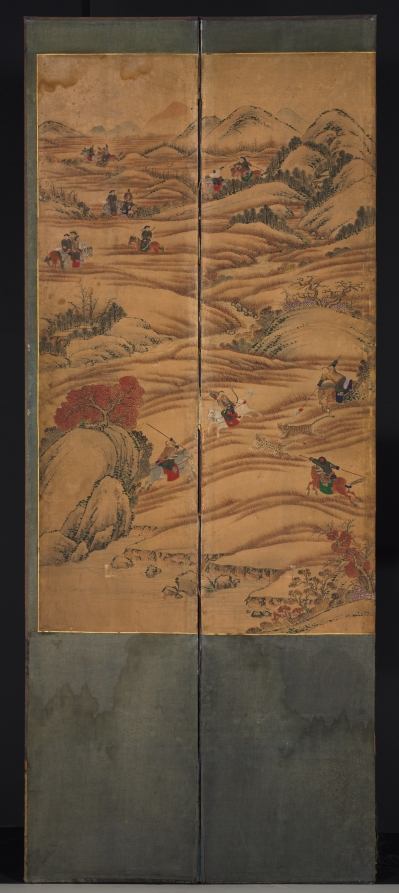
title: Hunting Scene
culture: Korea, Joseon dynasty (1392–1910)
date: 1800s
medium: eight-panel folding screen; ink and color on silk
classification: Painting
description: The theme of nomad warriors riding horses and hunting wild animals was first painted in the Qing imperial court in China in late 1600s. But it became favored by the Korean royal court and painted by the royal court painter in the late 1700s. The Joseon Korean ruling class members considered Qing nomad warriors to be "barbaric," yet highly admired their hunting and military skills. By the late 1800s, folding screens with the hunting scene were used largely for this dynamic and exotic feature.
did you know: The theme of nomad warriors hunting became highly appreciated in the Korean royal court of the 1700s for the king's particular interests in strengthening the royal army's military prowess.